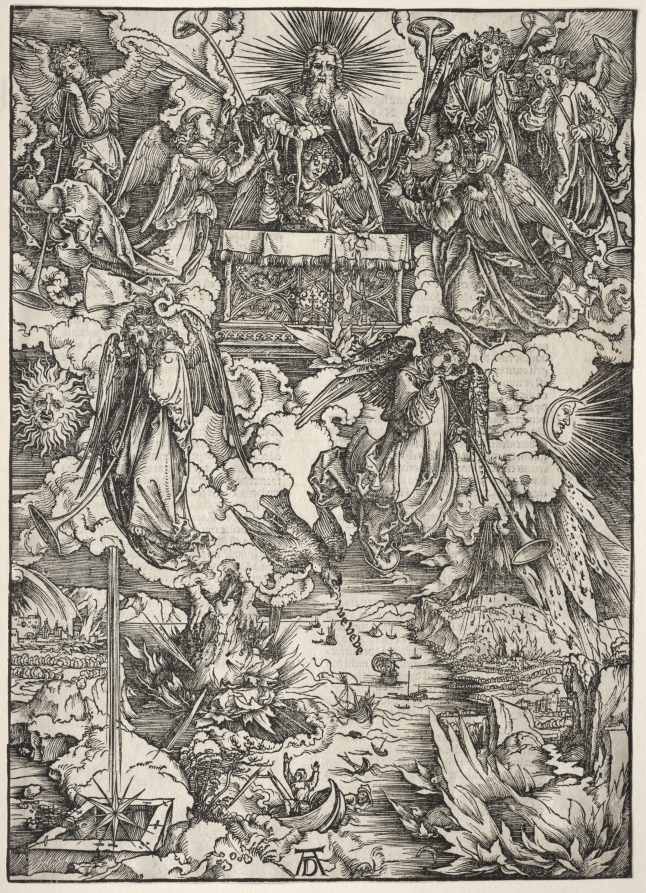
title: Revelation of St. John: Seven Angels with Trumpets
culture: Germany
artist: Albrecht Dürer (German, 1471–1528)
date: 1511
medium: woodcut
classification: Print